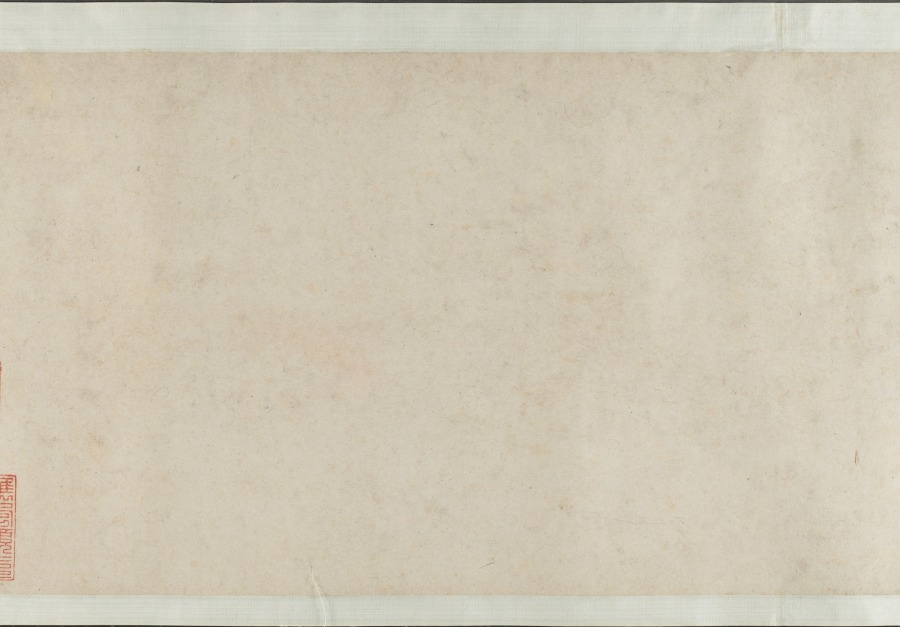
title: Garden for Solitary Enjoyment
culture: China, Ming dynasty (1368–1644)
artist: Qiu Ying (Chinese, 1494–1552)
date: 1515–52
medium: Handscroll; ink and light color on silk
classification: Painting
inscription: Accompanying text of an essay together with seven poems of Sima Guang (1019–1086) and one poem of Su Shi (1037–1101) written by Wen Zhengming (1470–1559) in 1558.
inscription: 2 colophons and 82 seals: 4 seals of Wen Zhengming 文徵明 (1470–1559); 59 seals of Xiang Yuanbian 項元汴 (1525–1590); 1 colophon, dated 1644, and 7 seals of Xiang Yukui 項禹揆 (c. late 1500s–1659); 1 colophon, dated 1880, and 2 seals of Weng Tonghe 翁同龢 (1830–1904); 2 seals of Ch'eng Chen-i (19th c.); 1 seal of Han Ch'ung (19th c.); 4 seals of Wan-go H. C. Weng 翁萬戈 (1918–2020); 3 seals unidentified.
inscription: Colophon by Xiang Yukui 項禹揆 (c. late 1500s–1659): The painting of The Garden for Self-enjoyment on the right by Shih-chou, Mr. Qiu [Qiu Ying] is in the style of Li Lung-mien. Its mood is peaceful, as if meeting the ancient gentlemen face to face among the brushes and silk; it lifts one above the sordid bustle of life. Formerly, my late father handed me this scroll which had only the painting without the written essay. I considered asking a good calligrapher to write the essay to add to it but was afraid that the quality of the writing would not match the painting. Several years later, I saw at a friend's house this essay and poems (of Ssu-ma Kuang] written by Hengshan [Wen Zhengming], once owned by my grandfather; so I spared no expense to obtain it. I rejoiced at this and said: "The divine swords are finally united. How things are pre-destined!" Now my friend Chang Kung-chao's technique for mounting [painting and calligraphy] is excellent. Therefore by daring to take them out and join them together, I can preserve this beautiful story of singular reunion. Xiang Yukui recorded at Hai-yeh-t'ang [hall] two days before New Year's Eve in the jiasheng year of the Chongzhen era [1644]. trans. LYSL/HK/WKH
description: Garden of Solitary Enjoyment refers to a site built in 1073 by the statesman Sima Guang (1019–1086) after he had retired to Luoyang, Henan province. Every spring, visitors would flock to his garden. Each of its seven structures references a historic figure. Sima wrote: I channel streams [like Du Mu], to water flowers [like Bai Juyi], or trim bamboo [like Wang Huizhi]. . . . I know of no joy between heaven and earth that could take its place. Qiu Ying’s painting, created after an 11th-century version of the same theme, must have appealed to garden owners of the Ming dynasty, since it became the template for numerous Suzhou workshop copies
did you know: Sima Guang completed his monumental survey of Chinese history, Zizhi tongjian, in the garden depicted in this painting.